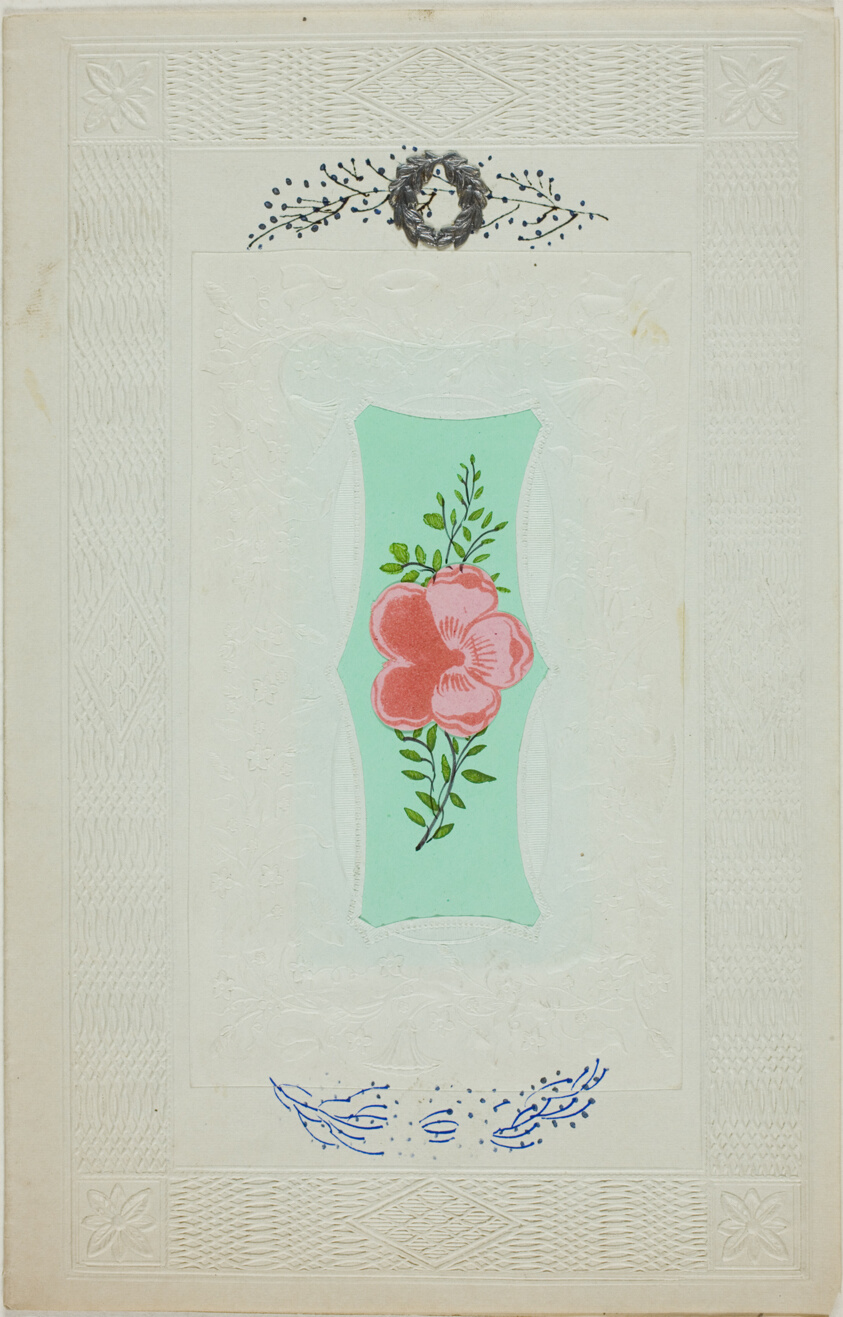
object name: Drawing and Watercolor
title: Untitled Valentine (Pink Flower on Green)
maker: Unknown Artist; English, 19th century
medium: Collaged elements and watercolor on embossed off-white wove paper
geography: England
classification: valentine; prints and drawing; paper